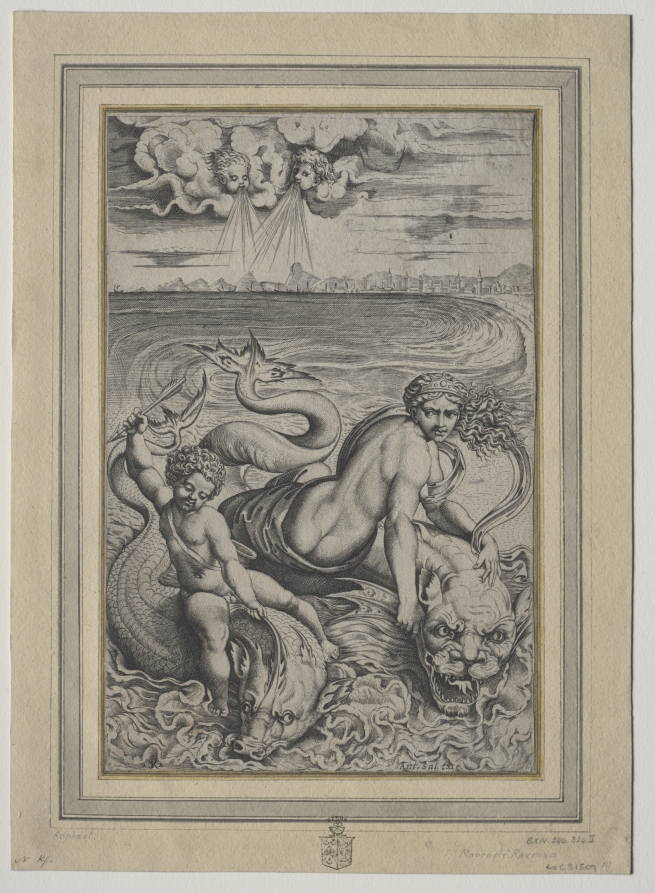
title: Love and Cupid Carried by Dolphins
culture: Italy, 16th century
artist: Marco Dente (Italian, c. 1486–1527)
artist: retouched by Francesco Villamena (Italian, 1566–1624)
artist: after Raphael (Italian, 1483–1520)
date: 1500s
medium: engraving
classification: Print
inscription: Publishers inscription in the plate, l.r.: Ant. Sal. exc. [Antonio Salamanca excudit] Marco Dente's monogram inscribed in plate, l.l.